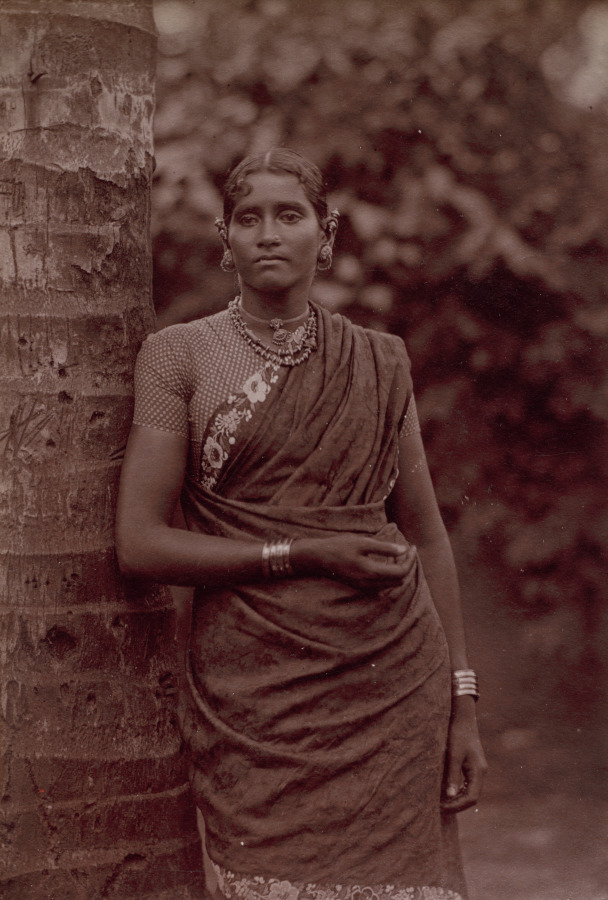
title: Ceylonese Woman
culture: India, 19th century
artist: Scowen & Co. (British, active Ceylon, 1876–1895)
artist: or Skeen & Co. (British, active 1860–1920)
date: c. 1880s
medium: albumen print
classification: Photograph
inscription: Written in pencil on verso: “14”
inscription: Written in pencil on verso: “[illegible handwriting, possibly Jamil]”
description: European photographers took portraits of the people of the colonized nations not for their subjects, but to sell them to governments as information, to tourists as aides memoires, and to “armchair tourists” as aids to the imagination.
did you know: Skeen & Co. and Scowen & Co., the two leading photographic establishments in Ceylon (now Sri Lanka) in the 1880s, rarely signed their work.